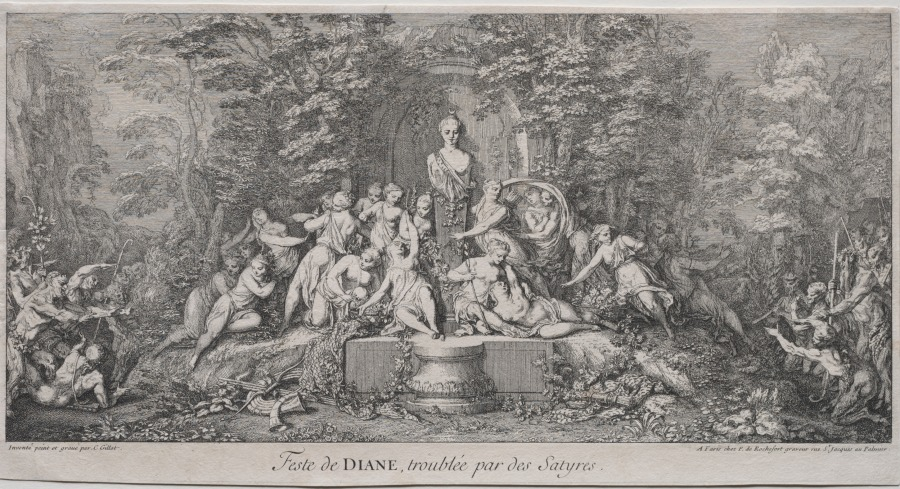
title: The Four Festivals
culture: France, 18th century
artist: Claude Gillot (French, 1673–1722)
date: c. 1693–1715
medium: etching and engraving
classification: Print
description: This depiction of the festival of Diana, Roman goddess of forests and animals, accompanies three other scenes glorifying the nature gods Faunus, Bacchus, and Pan. In each print a frame of flourishing vegetation surrounds nude and semi-nude figures who frolic around an altar with a bust to the god. The caption below the Festival of Diana declares that this celebration is being "troubled by satyrs," whose muscular, goat-legged bodies and leering faces appear at either edge of the wooded grove.